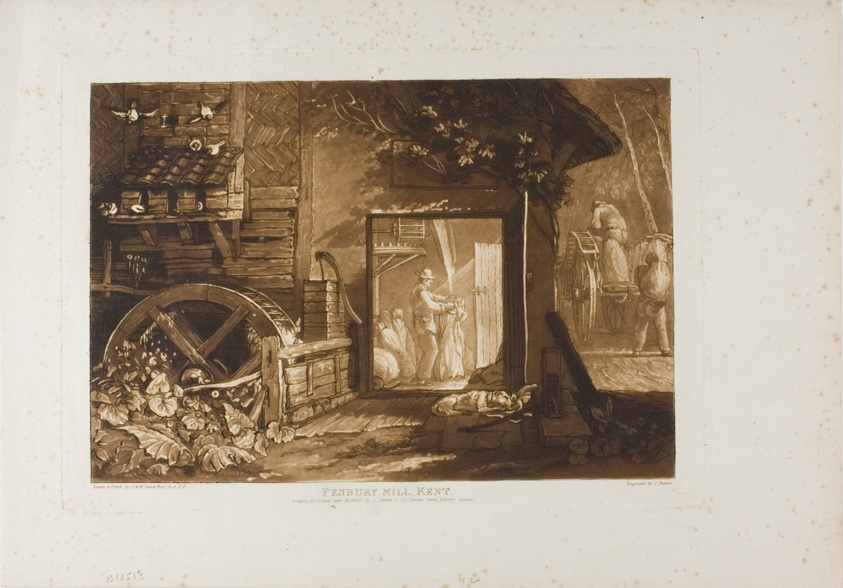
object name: Print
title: Pembury Mill, Kent, plate 12 from Liber Studiorum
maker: Joseph Mallord William Turner (English, 1775-1851); Engraved by Charles Turner (English, 1773-1857)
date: published June 10, 1808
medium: Etching and engraving in brown on ivory laid paper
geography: England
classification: etching; print; prints and drawing